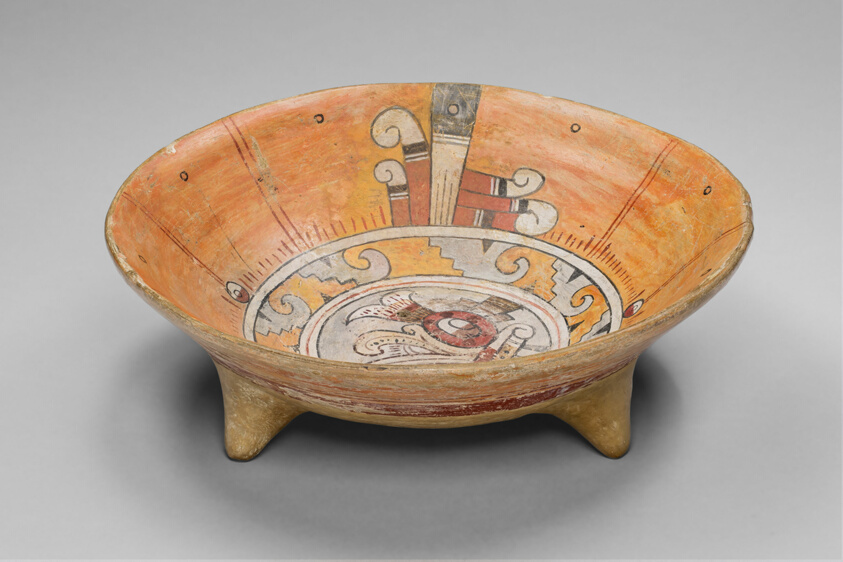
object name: Vessel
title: Tripod Bowl Depicting Head of Bird on its Interior Surface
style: cholula, Arts of the Americas, mesoamerican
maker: Cholula, Mixteca-Puebla style; Puebla, central Mexican highlands, Mexico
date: 1200–1521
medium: Ceramic and pigment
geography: Cholula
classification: bowl; earthenware; ceramics; vessel; art of the americas